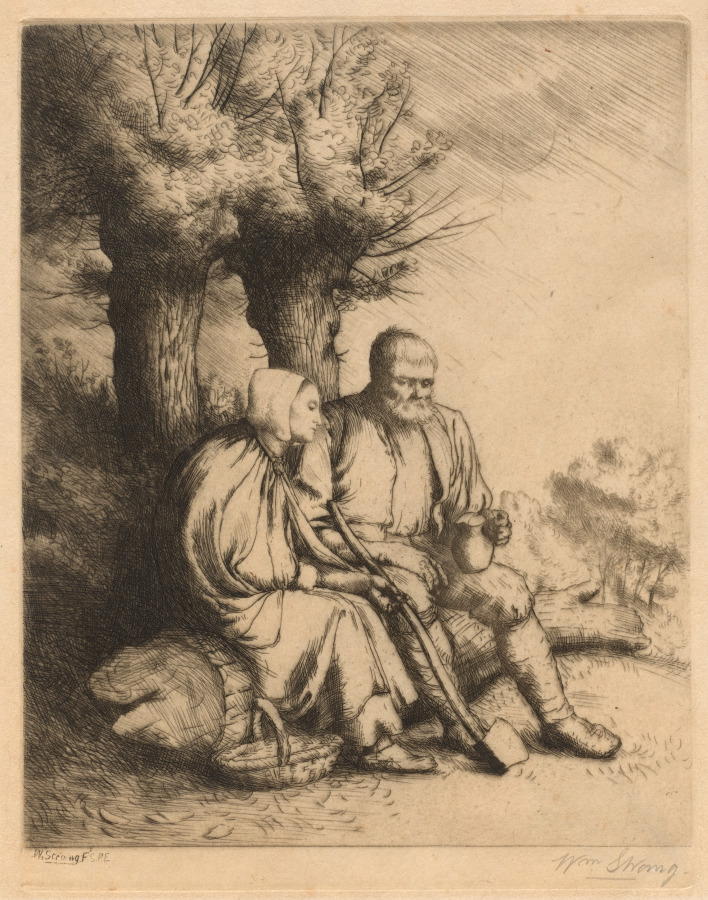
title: The Woodman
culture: Italy, 19th century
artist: William Strang (British, 1859–1921)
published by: Published in The Etcher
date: 1881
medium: etching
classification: Print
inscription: Lower right, in graphite: WM Strang.